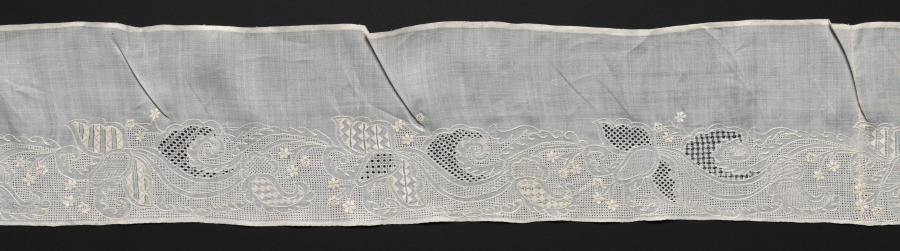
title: Embroidered Band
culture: France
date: 1800s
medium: Plain weave linen: needle lace (cutwork and drawnwork) and embroidery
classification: Embroidery